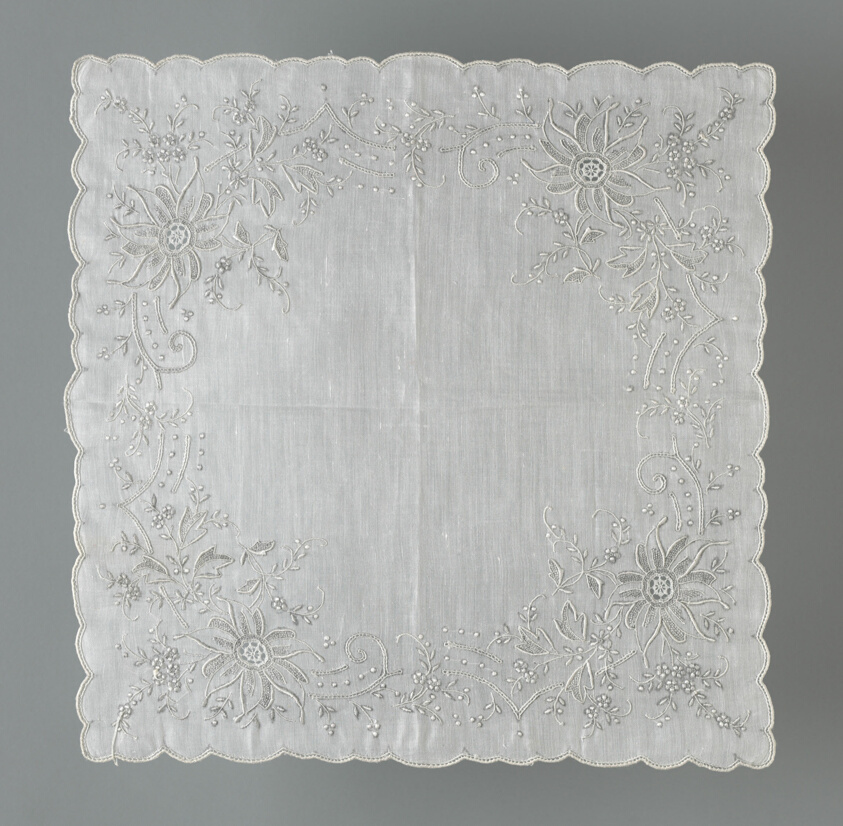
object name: Costume and Accessories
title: Handkerchief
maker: Philippines, Manila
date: 19th century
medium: Linen; embroidered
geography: Philippines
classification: textile; needlework (visual works); costume